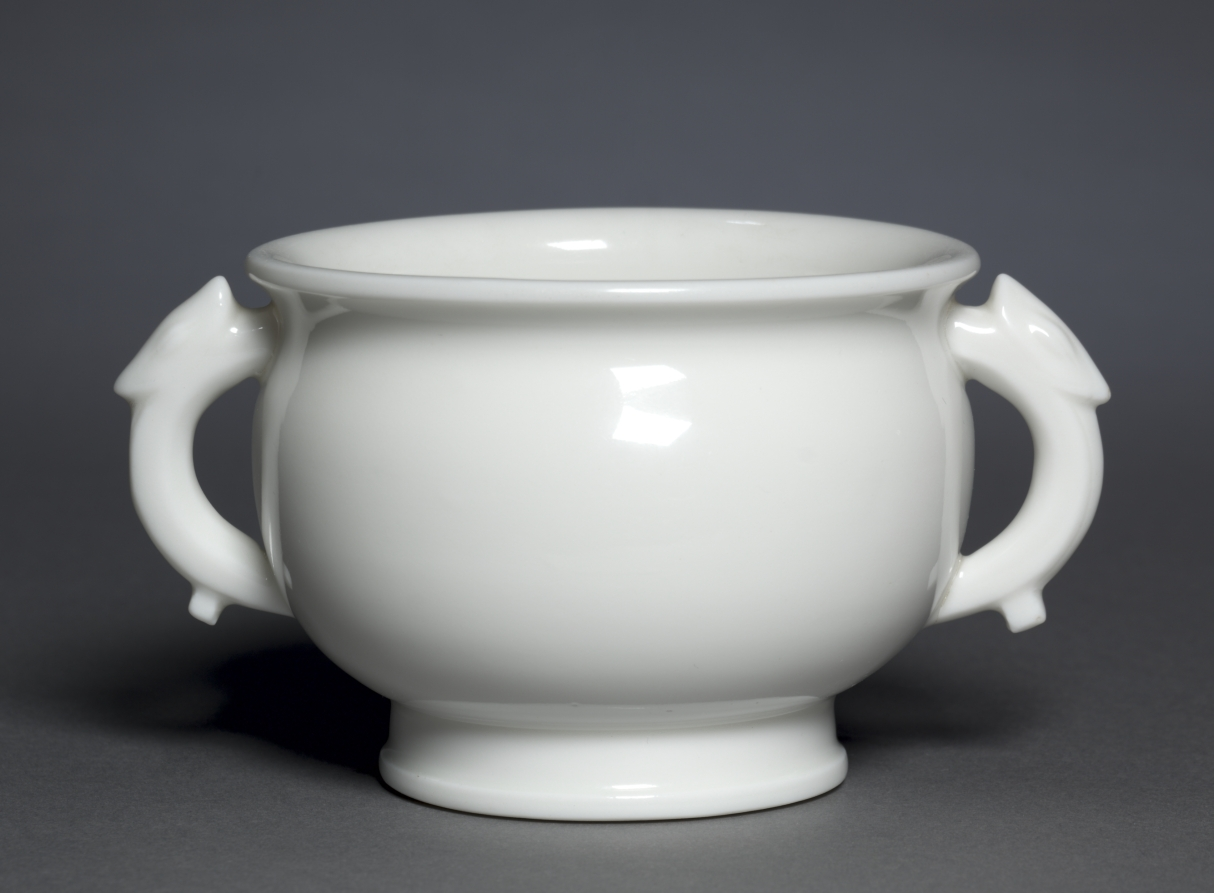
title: Incense Burner in the form of an archaic bronze vessel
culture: Chinese, Fujian province, Dehua, Ming dynasty (1368-1644)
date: 1600s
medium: Glazed white porcelain, Dehua ware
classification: Ceramic